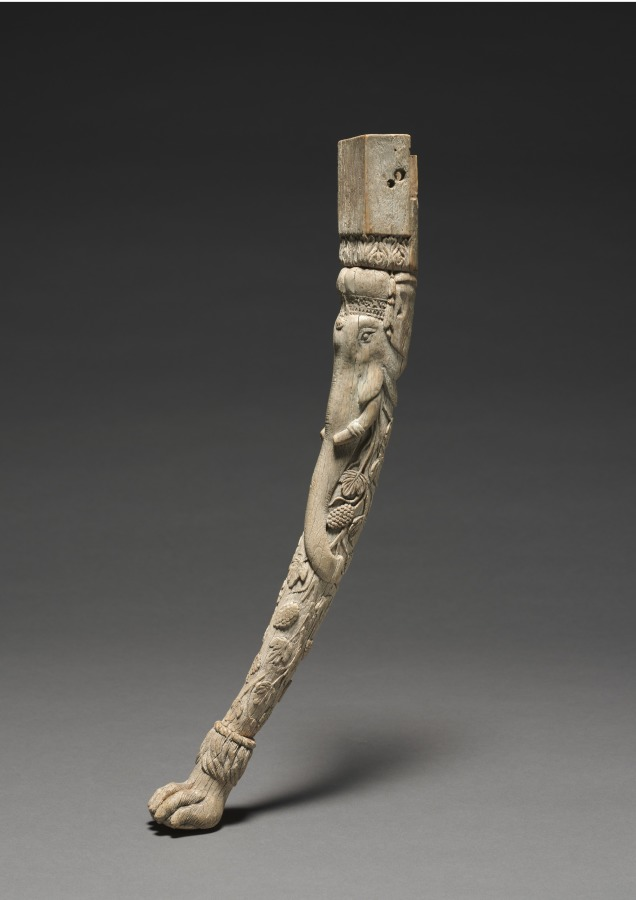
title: Chair Legs and Panel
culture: Afghanistan, Begram (chair legs); India (panel), Kushan period (chair legs); Mughal dynasty (1526-1756) (panel)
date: 300s CE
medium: ivory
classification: Ivory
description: This ivory carving was made to sheath wooden furniture made in India for trade along the Silk Road, which stretched from Rome to China. Indian ivory-faced furnishings--along with lacquer boxes from China and painted glass from Rome--were found in an extraordinary deposit of luxury goods at a site called Begram. The wood on which the ivory and lacquer were affixed has long disintegrated, and only the small pieces remain.